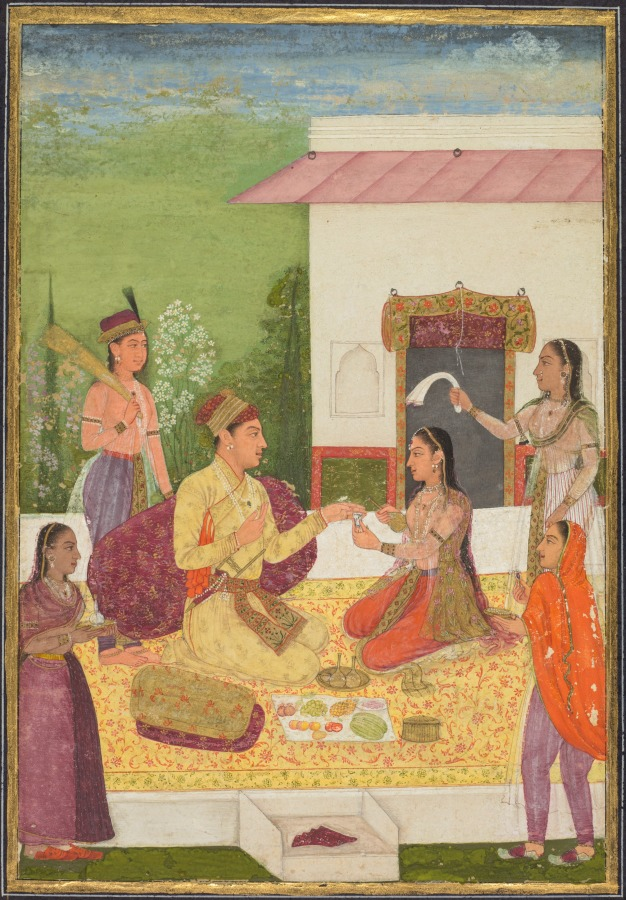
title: A prince conversing with a woman while taking refreshments on a terrace (recto)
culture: Mughal India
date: c. 1710–20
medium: Gum tempera, ink, and gold on paper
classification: Painting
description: The carpet turns a terrace into a space where a prince can enjoy the company of women over wine and fruits. A covered box on the carpet contains aromatic betel nut packets for pleasurable chewing. He has removed his shoes, which are left on the marble step. A princess pours liquor from a golden bottle into a tiny blue-and-white ceramic cup. The pair’s royal status is indicated by the attendants who hold the white cloth and peacock-feather whisks. Two other women bring jewels and a vial of perfume to be inspected and discussed by the royal connoisseurs.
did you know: The prince removed his shoes before joining the picnic on the carpeted terrace.